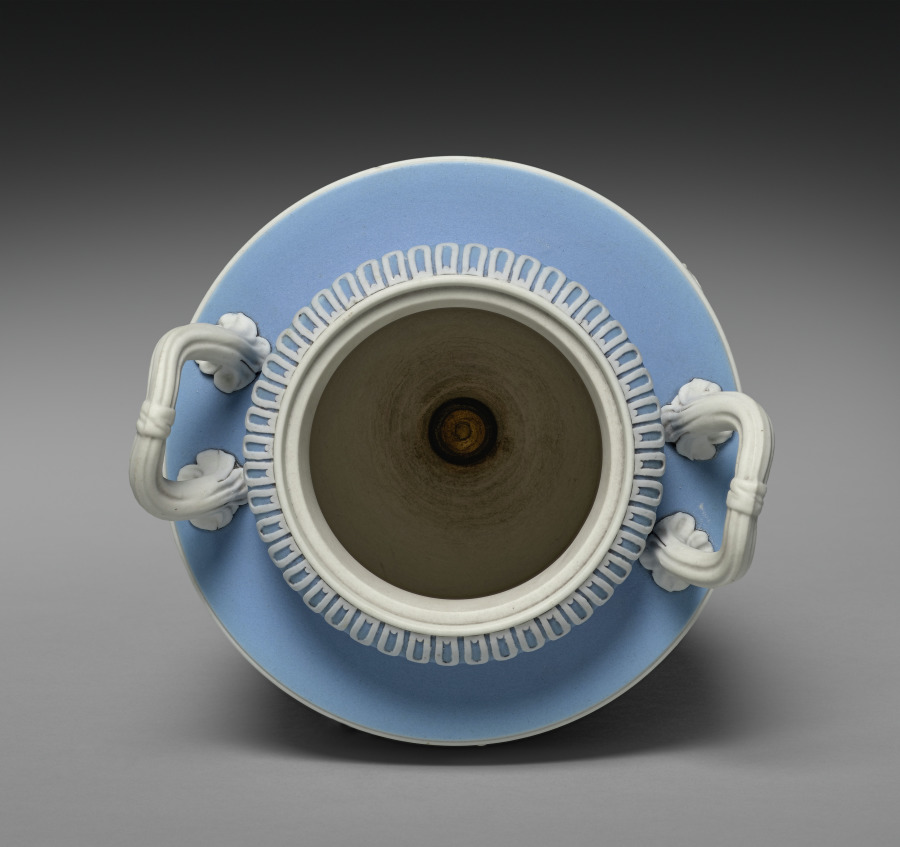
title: Vase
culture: England, Staffordshire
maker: Josiah Wedgwood and Sons (British, Staffordshire, est. 1759)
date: c. 1850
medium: jasper ware with relief decoration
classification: Ceramic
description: Wedgwood's tricolor jasperware first became popular in the 1770s during a period of fascination with neoclassical decoration. This vase was probably made around 1850 during the period when this type of decoration was revived. The relief medallions depict two versions of the Greek god Apollo, the god of music, next to his harp or lyre.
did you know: See cover record.